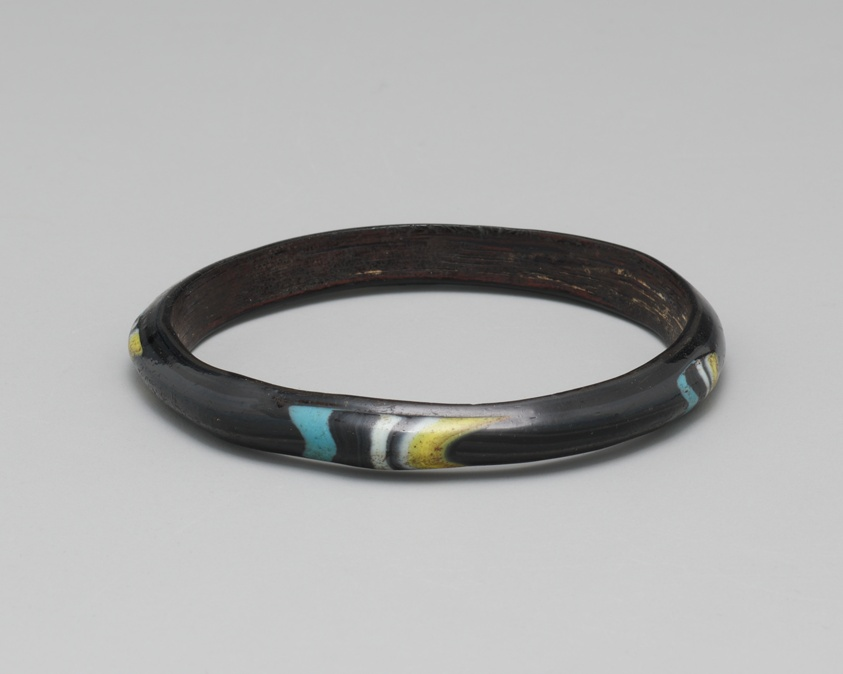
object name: Costume and Accessories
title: Bracelet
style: Islamic (culture or style)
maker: Islamic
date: 14th-15th century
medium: Glass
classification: glass; jewelry; ancient art; costume